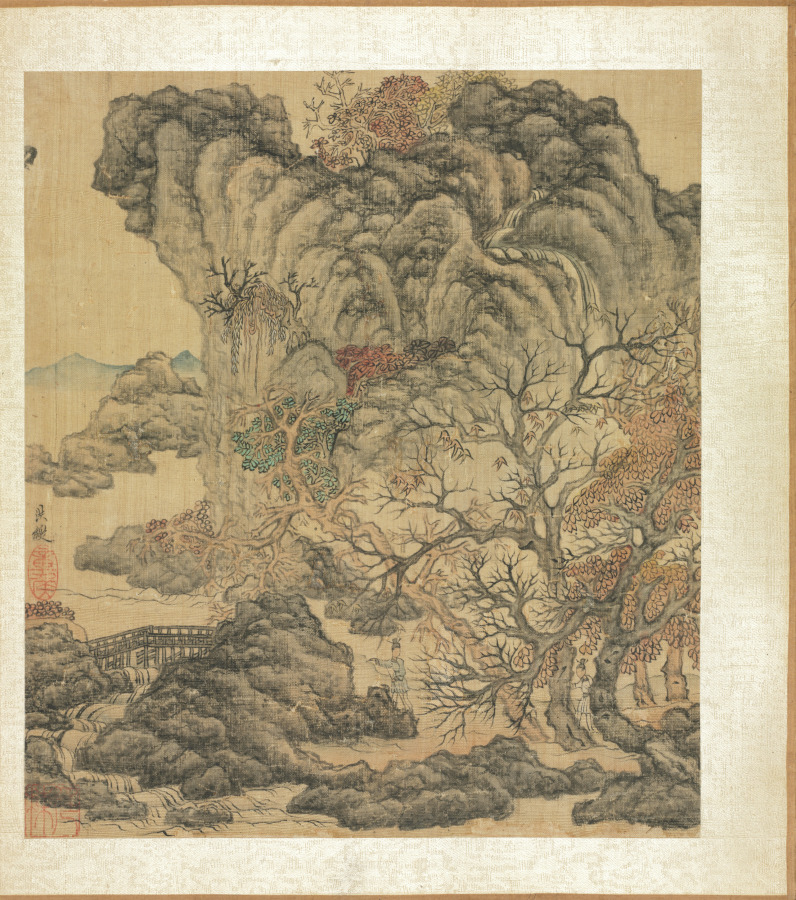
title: Paintings after Ancient Masters:Travelers in an Autumn Landscape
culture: China, Ming dynasty (1368–1644)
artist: Chen Hongshou (Chinese, 1598/99–1652)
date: 1598–1652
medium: album leaf, ink and color on silk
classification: Painting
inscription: Hung-shou [seal] Chang-hou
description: The twenty paintings in this double-album by Chen Hongshou include landscapes, figures, and flowers. It also has one leaf featuring a woman, an often-used subject not found in the other albums from the latter part of his career. His late works are wonderful summations of Chen's peculiar and quirky art--archaistic, hyper-refined--but without accompanying shallowness or sentimentality. His figures and landscapes in the late albums are miniaturized, not unlike the small Chinese gardens, or the carefully selected small table rocks or old roots used for contemplation to see the world in miniature. This loss of scale is quite deliberate and reflects the psychological situation of a depressed class like the Ming loyalist officials and scholars, deprived of their integrity and honor, and forced to lead a diminished and restricted existence.